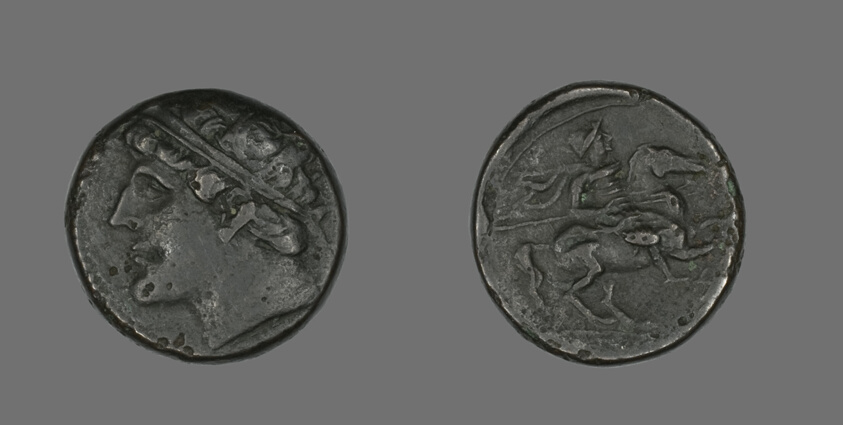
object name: Coin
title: Coin Portraying King Hieron II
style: greek, ancient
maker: Greek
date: 274-216 BCE (Reign of Heiron II)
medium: Bronze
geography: Syracuse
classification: coin; ancient art; struck